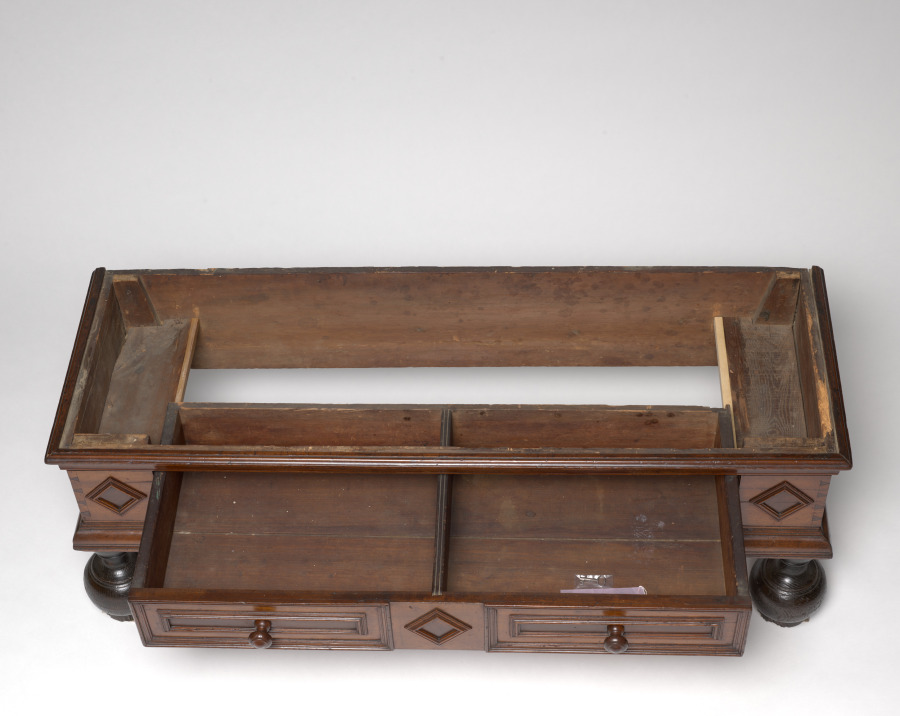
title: Kast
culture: American, King County, NY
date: c. 1710–1740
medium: Various woods, wrought iron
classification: Furniture and woodwork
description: The earliest furniture made in America often shared similarities with works made in the country from where the settlers originated. With its bun feet, paneled surface, and broad projecting cornice, this wardrobe (kast) resembles earlier Dutch examples that come from Amsterdam and its surrounding areas. Therefore, this wardrobe was likely made by the Dutch settlers who colonized New York and New Jersey.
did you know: This Dutch American wardrobe was likely made in a community along the Hudson River in New York by a cabinetmaker who had originally come from the region in or around Amsterdam in Holland.